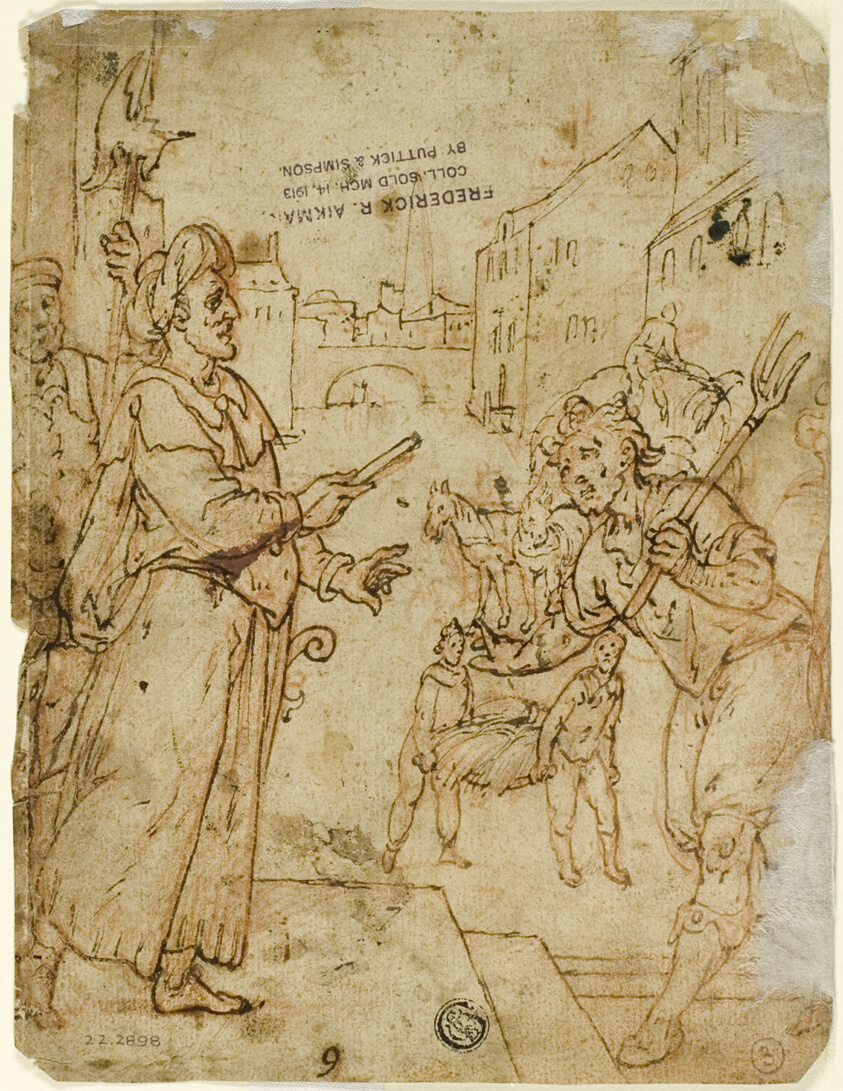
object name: Drawing and Watercolor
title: Joseph Interpreting the Pharoah's Dream (recto) Joseph before His Brothers (verso)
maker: Circle of Aurelio Lomi (Italian, 1556-1622)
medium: Pen and brown ink over red chalk, on tan laid paper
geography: Italy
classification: pen and ink drawings; drawings (visual works); prints and drawing